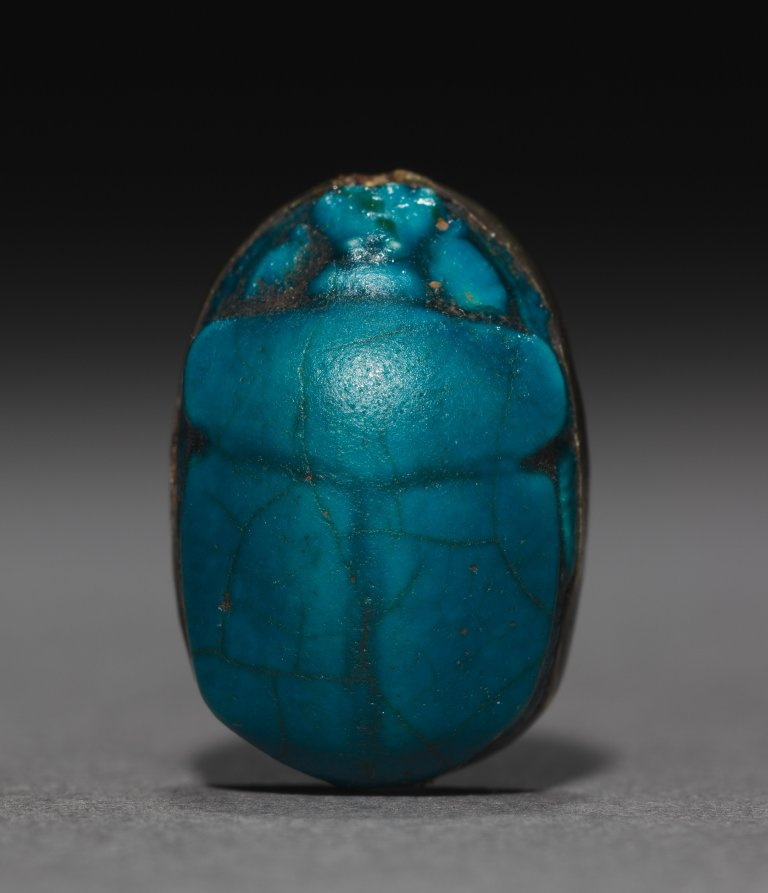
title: Scarab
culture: Egypt, Middle Kingdom (2040–1648 BCE), Dynasties 12–13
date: 1980–1648 BCE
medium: blue-green glazed steatite, gold mount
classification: Scarabs